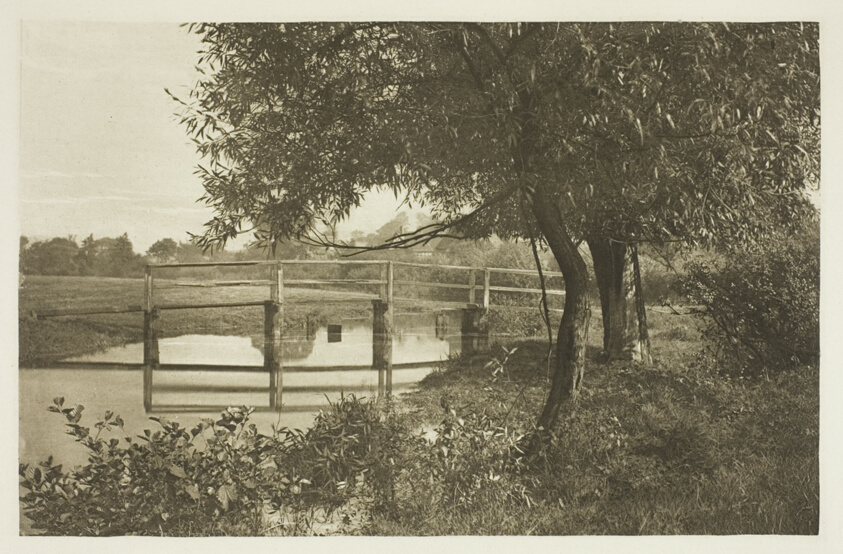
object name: Photograph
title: On the "Sow," Near Walton's House at Shallowford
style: 19th century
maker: Peter Henry Emerson (English, born Cuba, 1856–1936)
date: 1880s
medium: Photogravure, plate XXXI from the album "The Compleat Angler or the Contemplative Man's Recreation, Volume II" (1888)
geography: England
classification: photogravure; photomechanical process; photography; photograph